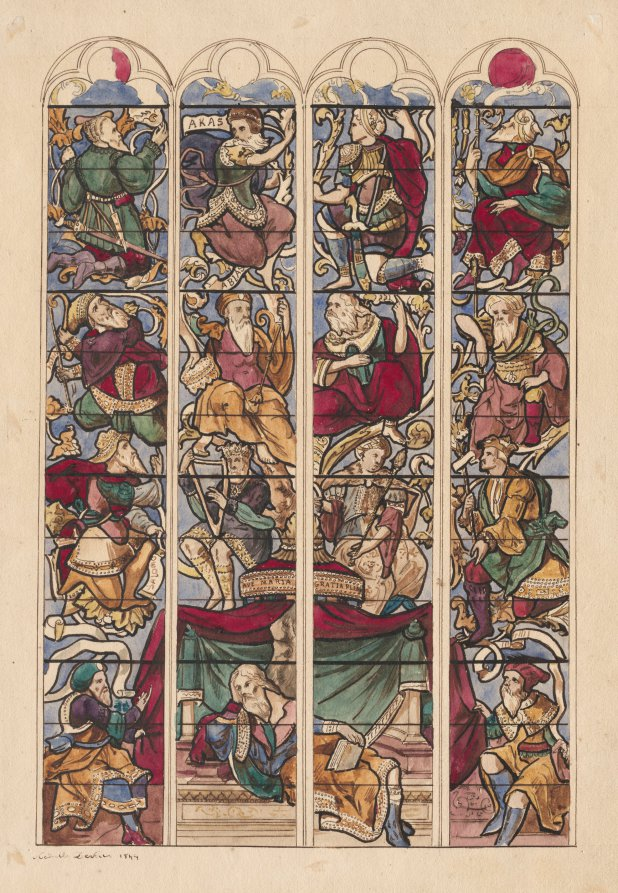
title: Study for Four Stained Glass Windows "Généalogie d'Abraham"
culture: France, 19th century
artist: Achille Devéria (French, 1800–1857)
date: 1844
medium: black and brown ink, watercolor with graphite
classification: Drawing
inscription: Signed and dated lower left in brown ink: Achille Déveria 1844 Inscribed upper right in graphite: Généalogie d'Abraham